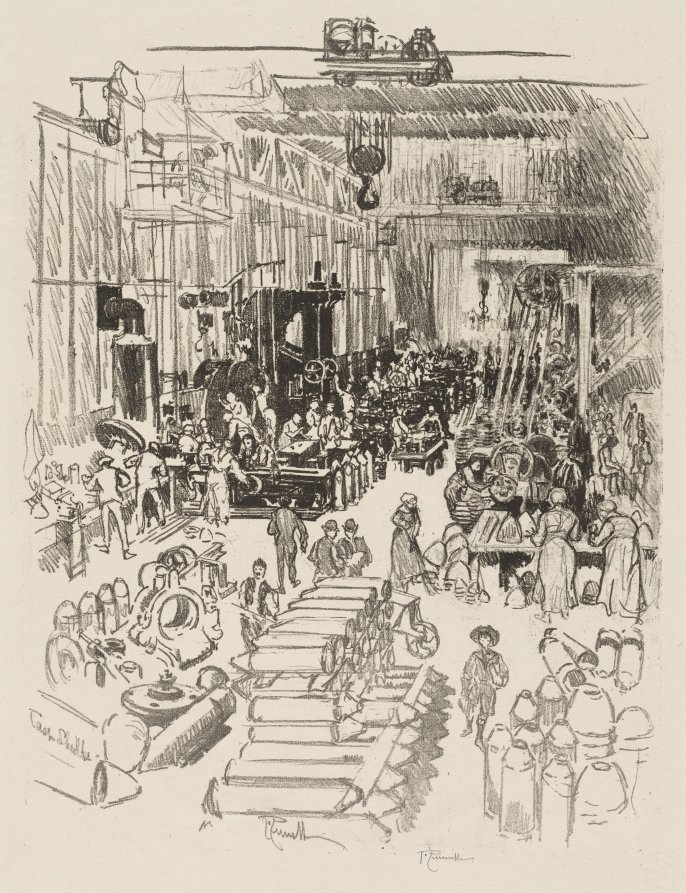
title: English War Work: Finishing Shells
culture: America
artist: Joseph Pennell (American, 1857–1926)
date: 1916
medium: lithograph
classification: Print